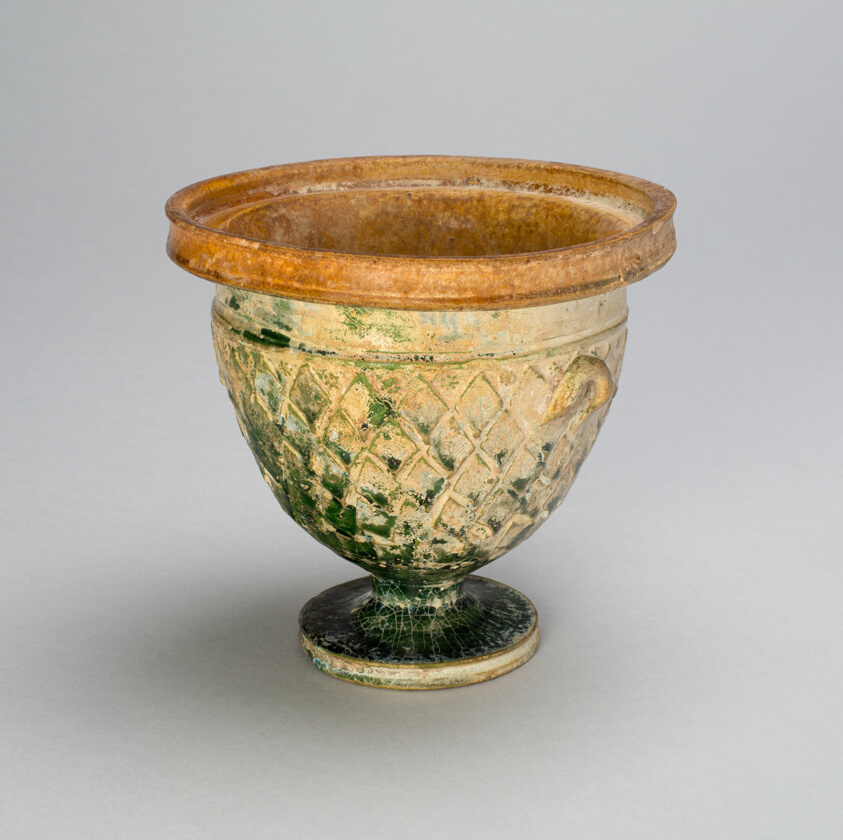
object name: Vessel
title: Footed Cup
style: greco-roman, greco-roman (egyptian)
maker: China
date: Northern Qi dynasty (550–577)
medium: Earthenware with brown and lead green glazes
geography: China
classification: drinking vessel; asian art; ceramics; vessel